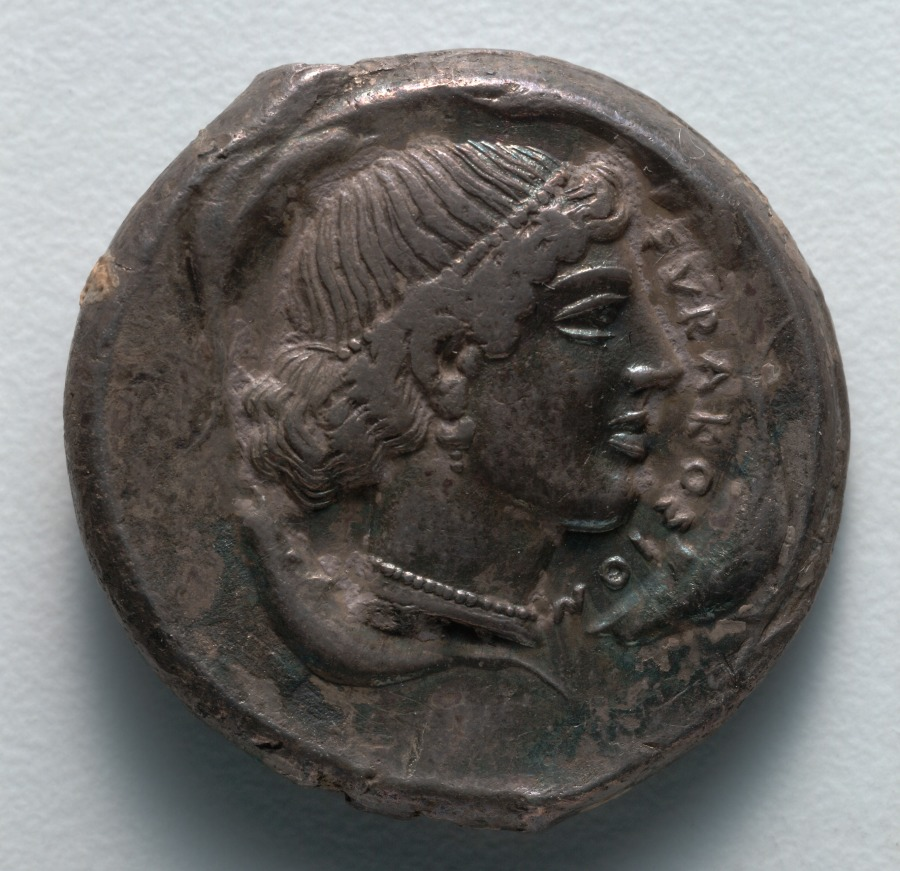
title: Tetradrachm: Quadriga (obverse); Head of Arethousa (reverse)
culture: Greek, minted at Syracuse (Sicily)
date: c. 467–440 BCE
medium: silver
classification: Coins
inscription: ΣΥΡΑΚΟΣΙΟΝ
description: On the obverse of this highly symbolic coin is the head of Arethousa, a local goddess of Syracuse who fled from mainland Greece and arose on the site as a freshwater fountain. Four dolphins swim around her, suggesting Syracuse’s humble beginnings as a small island colony. On the reverse, a racing four-horse chariot recalls Syracuse’s past victories in Panhellenic games.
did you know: Three dolphins and a bit of a fourth are still visible swimming clockwise around Arethousa.